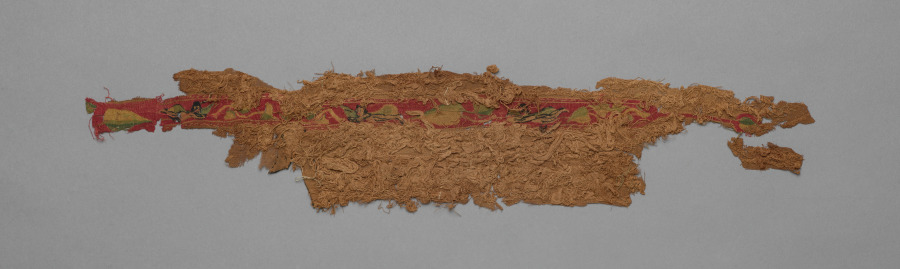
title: Fragment from a Tunic: Neck Opening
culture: Egypt, Umayyad period (661–750)?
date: 600s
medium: tabby weave, inwoven tapestry ornament; wool and linen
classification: Textile